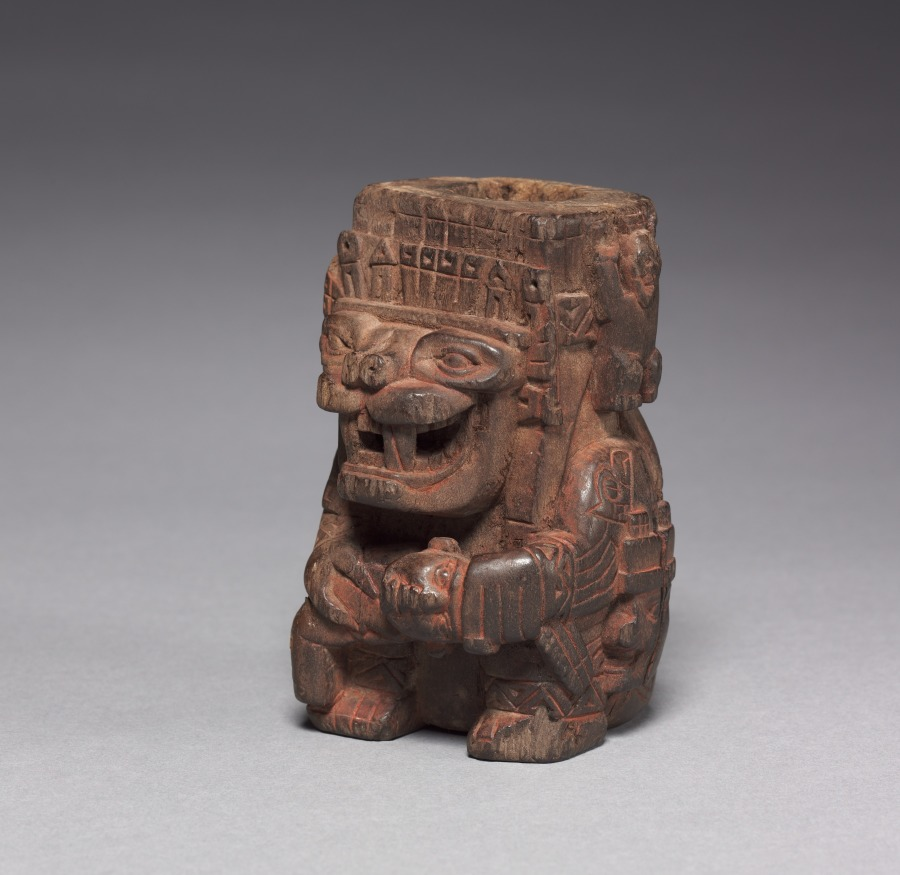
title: Sacrificer Container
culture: Central Andes, Wari style (600-1000)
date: 770–890 (radiocarbon date, 95% probability)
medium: wood and cinnabar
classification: Wood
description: This container assumes the shape of a magnificent, feline-headed, supernatural sacrificer who draws a knife across the throat of the human it holds in its lap. Severed human heads hang from the feline's belt and dangle by the trachea at the back of its headdress. Sacrifice had a place in Wari religious practice, probably as an unusual and exceptionally precious offering made to entice the benevolence of cosmic forces. Indeed, colonial-period Andean people believed that death was a prerequisite for the renewal of the world.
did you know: Traces of cinnabar, a toxic mercuric sulfide, are visible on the container's surface.